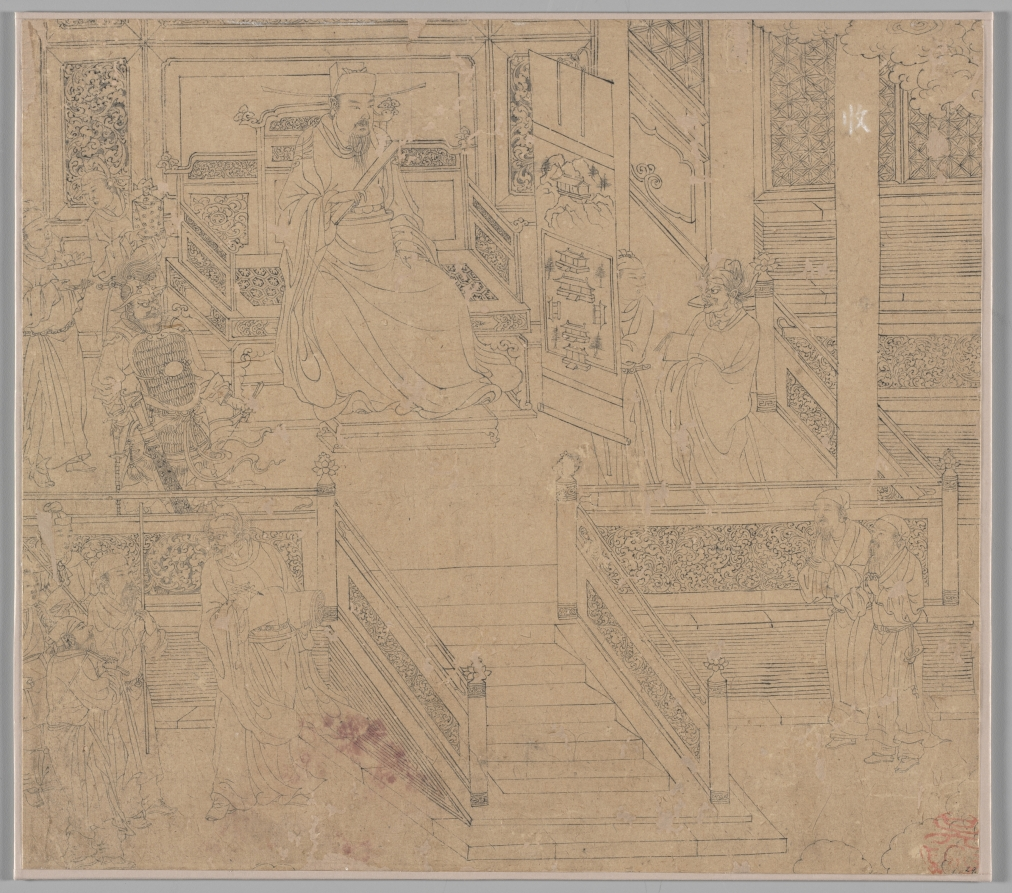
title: Album of Daoist and Buddhist Themes: Kings of Hells: Leaf 29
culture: China, Southern Song dynasty (1127-1279)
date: 1200s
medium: Album, ink on paper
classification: Painting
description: This leaf belongs to the album’s second series of narratives, Ten Kings of Hells. It demonstrates a Chinese-Buddhist approach in which the netherworld is divided into ten realms, each ruled by one of these kings. This particular version portrays the king in a benevolent guise, though his identity remains unclear. He is draped in a robe and holds an ivory plaque. A vertical scroll hangs to his left, depicting in the lower two-thirds a rectangular architectural plan with buildings aligned in a symmetrical arrangement not unlike a Buddhist temple or a Confucian shrine. Above, the scene also features a building and could show a specific mountain. One of the Ten Kings is known as the King of Taishan (or Mt. Tai). This depiction would represent a unique treatment of the king, not shared with other renditions of the same figure elsewhere.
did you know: This King of Hell wears a hat with two slender side arms—similar to the headgear worn by Song dynasty emperors.